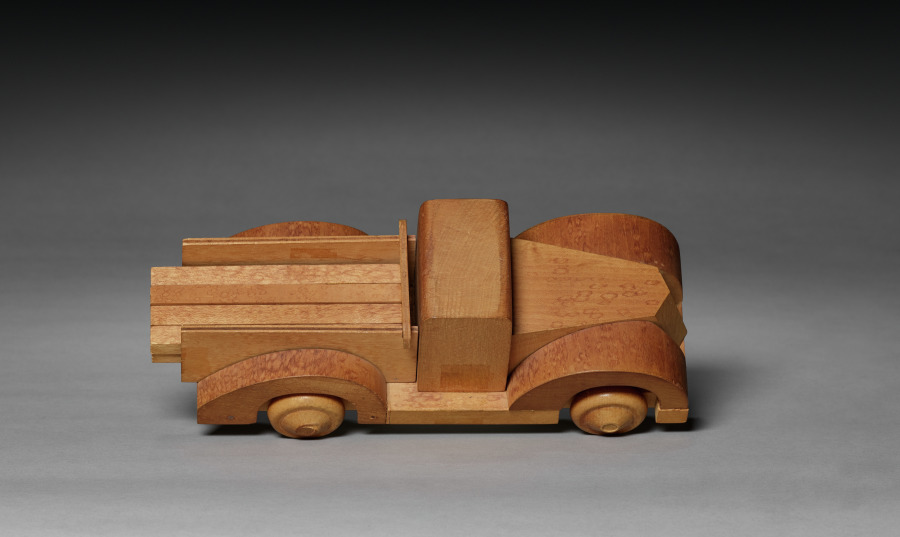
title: Boysen Toys (truck)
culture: Denmark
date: 1900s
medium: Wood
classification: Wood